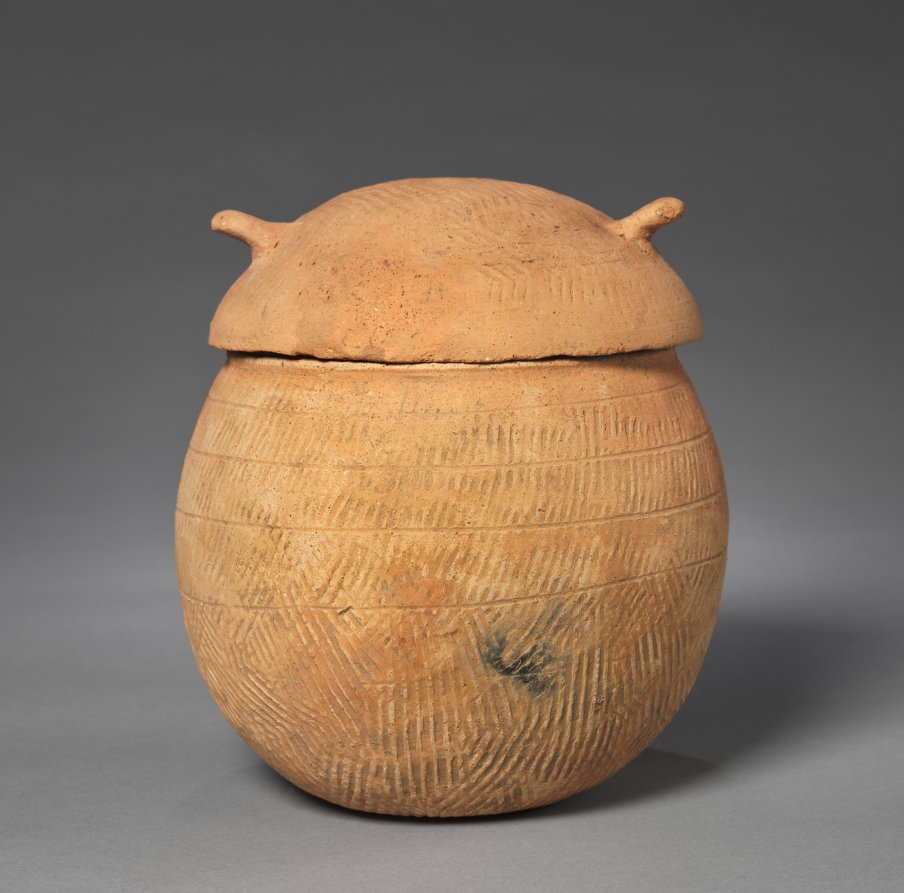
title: Lidded Vessel with Loop Handles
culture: Korea, Three Kingdoms period (57 BCE–668 CE)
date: 57 BCE–668 CE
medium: earthenware, with impressed, paddled, and incised decoration and red slip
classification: Ceramic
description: This small storage jar was hand built from coils of clay before it was finished on a potter's wheel. The thick, vertical ridges covering the surface were impressed into the wet clay using a carved wooden paddle. This network of raised lines was then intersected by four incised lines coursing around the bulbous form and separating the body into lower and upper areas with deft visual simplicity. Such direct, effective design solutions to ceramic decoration appear frequently in early Korean ceramics. The two perforations in the upper body were no doubt used to help secure the lid to the body with cord.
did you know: Closed kilns built on hills became widely used for producing this type of pottery vessel in Korea during the Three Kingdoms period.